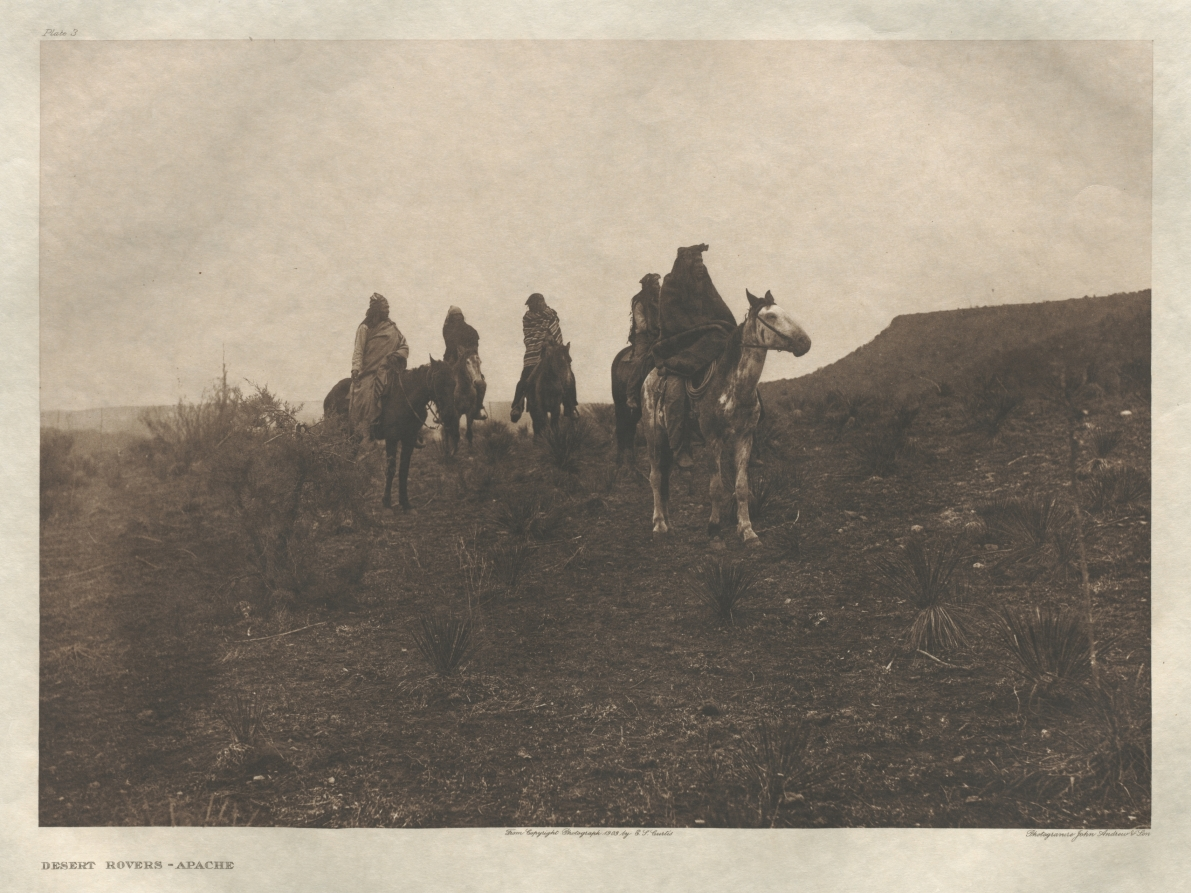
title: Portfolio I, Plate 3: Desert Rovers-Apache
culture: America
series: The North American Indian: being a series of Portfolios picturing and describing the Indians of the United States, the Dominion of Canada, and Alaska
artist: Edward S. Curtis (American, 1868–1952)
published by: The University Press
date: 1903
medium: photogravure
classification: Portfolio